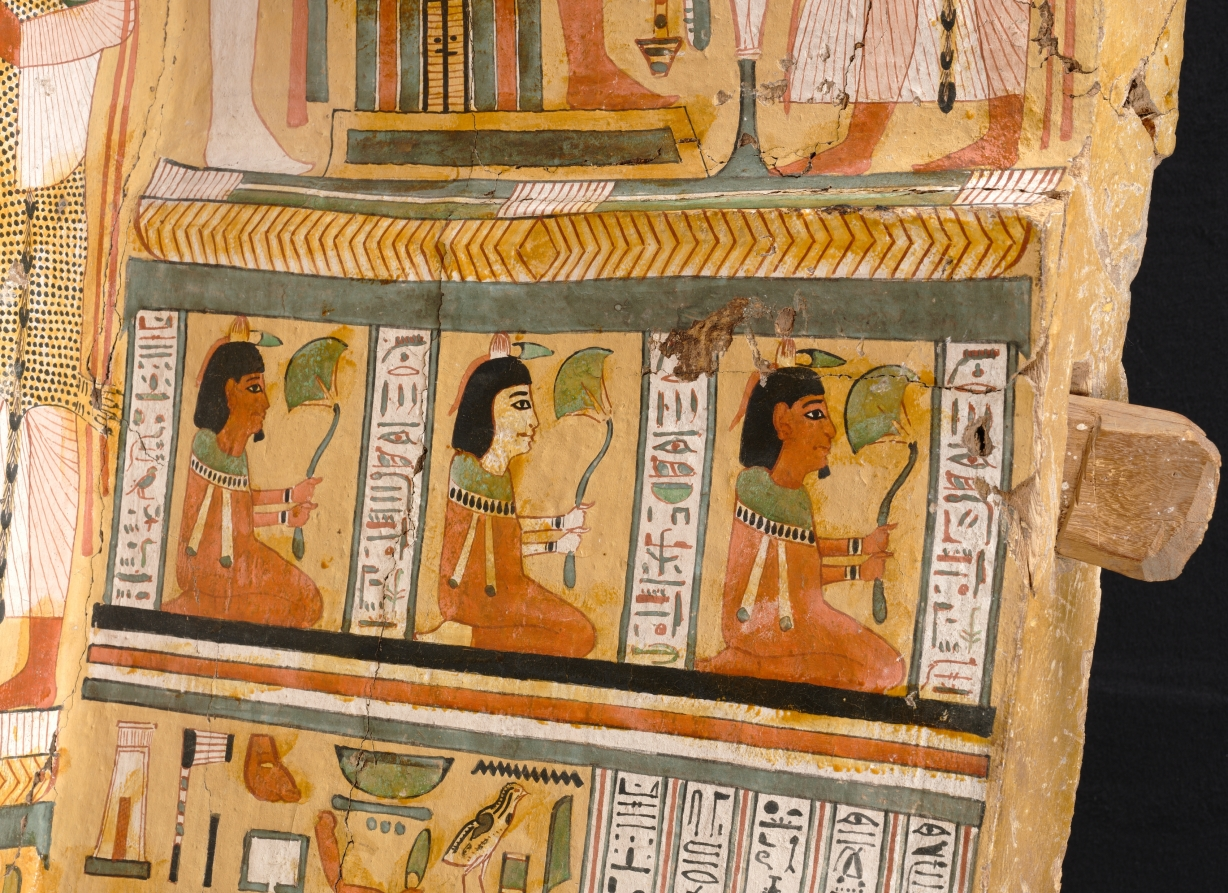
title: Coffin of Nesykhonsu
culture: Egypt, Thebes, Third Intermediate (1069–715 BCE), Dynasties 21–22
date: c. 976–889 BCE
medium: gessoed and painted sycamore fig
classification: Funerary Equipment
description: Egyptian coffins told stories and illustrated spells to help the deceased transition safely to the afterlife. Inside Nesykhonsu's coffin there are two jackals, one facing right and the other left, near the top. Here, the jackal represents the powerful deity Anubis, the god of the afterlife and embalming.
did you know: Two of Nesykhonsu's titles, "Lady of the House" and "Singer of the Choir of Mut the Great," are written on the outside of the coffin.